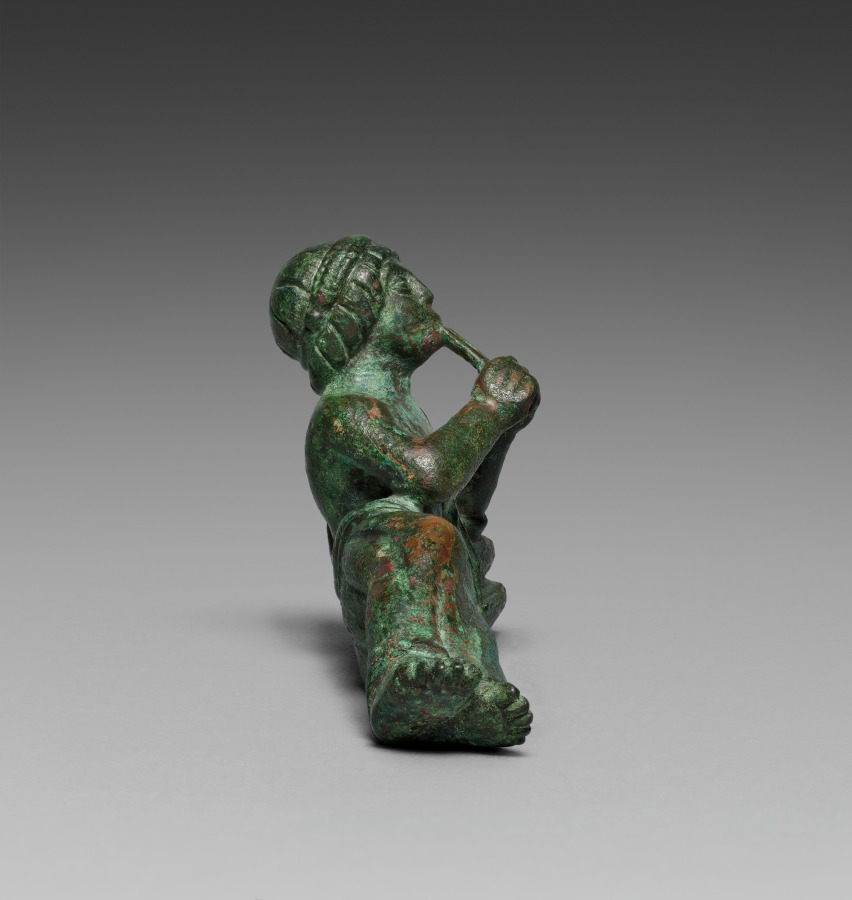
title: Vessel Ornament of Reclining Pipes Player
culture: Etruscan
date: probably 400–375 BCE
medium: bronze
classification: Sculpture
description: This bronze banqueter figurine was one of six once adorning the rim of a large basin, now lost. Cast in molds with individualized details, most have grooves on their underside to attach to the basin. Minute traces of gilding remain on areas of clothing and skin (mostly visible only under magnification), suggesting that they may have been completely gilded. Two handles in the form of hippocampi, horses with serpentine tails, also belonged to the basin and are now displayed at the Michael C. Carlos Museum at Emory University. The basin may have been used to hold liquid for a banquet, or was perhaps funerary. This bronze reclining figurine raises his head and blows into a set of pipes. The tips of the pipes are broken off. Some gilding remains on the mouth and chin. The figurine wears a himation over his body and has a bare chest. Two pillows prop up his left elbow. His hair falls over his forehead in square bangs.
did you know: Guests were often invited to play instruments and sing during symposia.